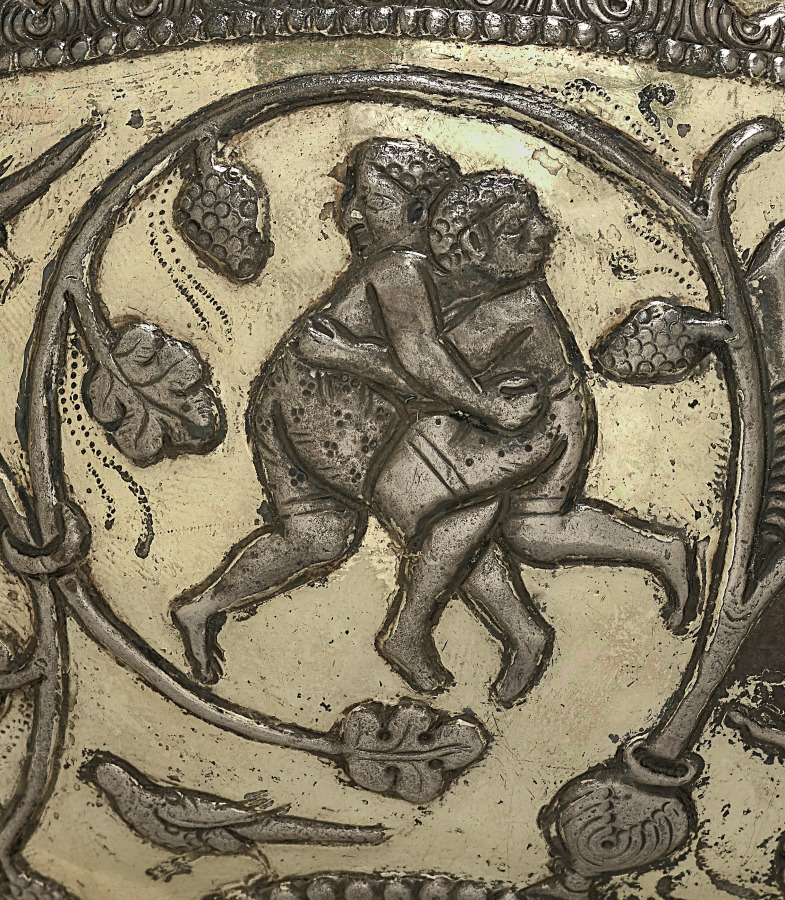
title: Bowl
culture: Iran, Sasanian Empire (224–651 CE)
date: 500–700 CE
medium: silver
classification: Metalwork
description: Every good Zoroastrian was supposed to spend one-third of his day farming; one-third philosophizing; and one-third eating, resting, and at pleasure. The abundance of Sasanian luxury goods is evidence of the importance accorded the last third of the day.